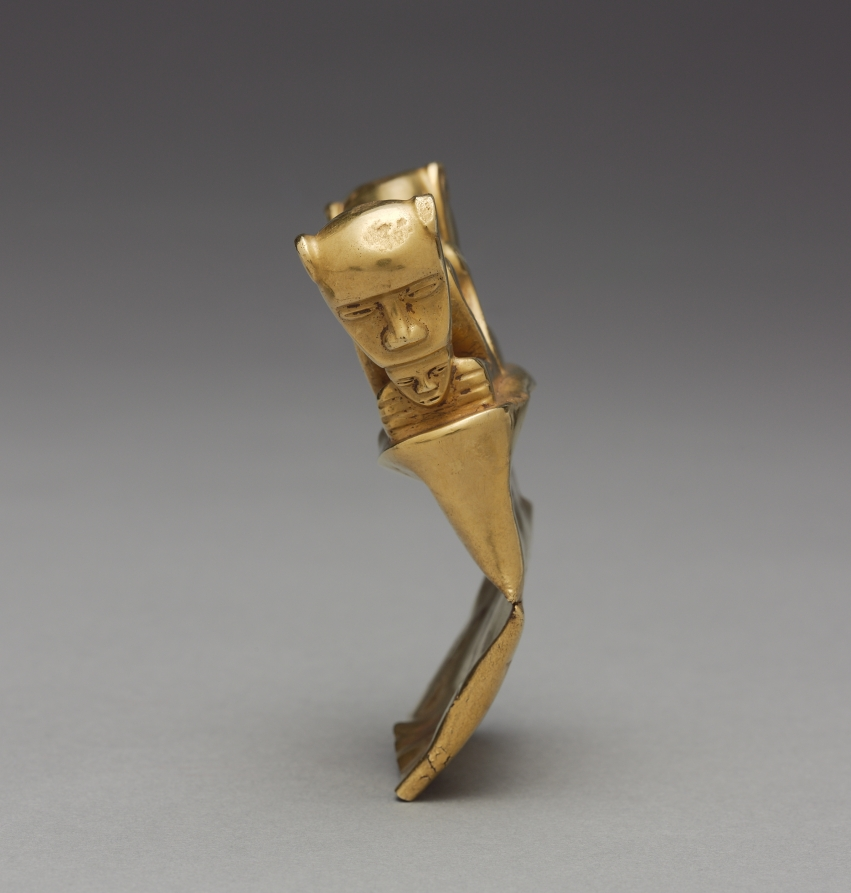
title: Staff Head(?)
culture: Colombia or Panama, International style, 5th-8th Century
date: c. 400–700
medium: cast gold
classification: Metalwork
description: The two-headed beast that crouches on the top of this object-perhaps a staff finial (head)-holds a human head or perhaps a mask between its paws. The silken surface and simple, elegant design identify the finial as of the International style, so-called because it crossed ancient boundaries and is found in Colombia as well as Costa Rica and Panama.